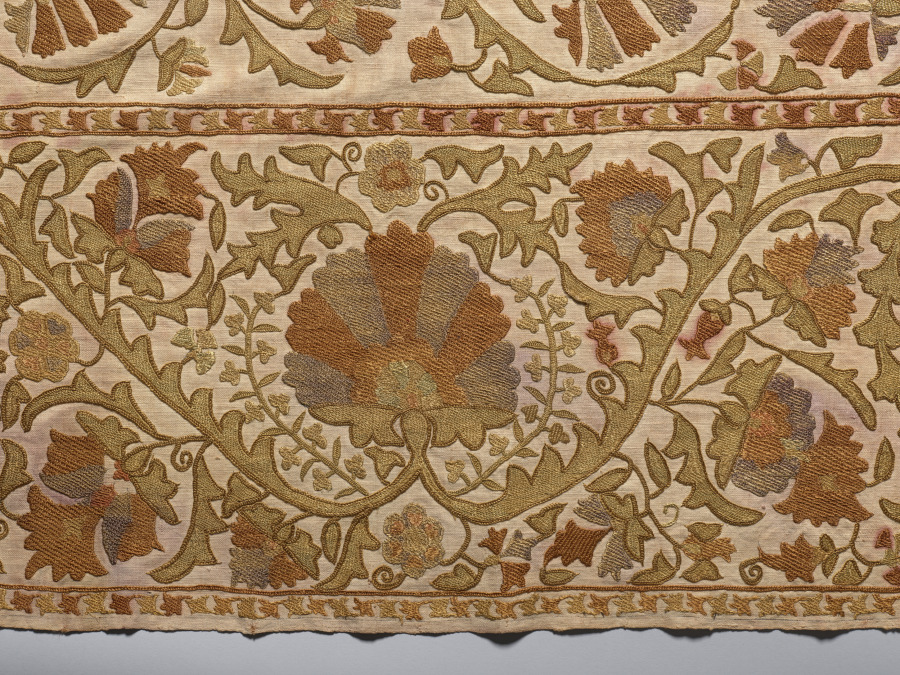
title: Embroidered Cover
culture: Uzbekistan, Bukhara, 19th century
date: 19th century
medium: embroidery: silk on cotton tabby ground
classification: Embroidery